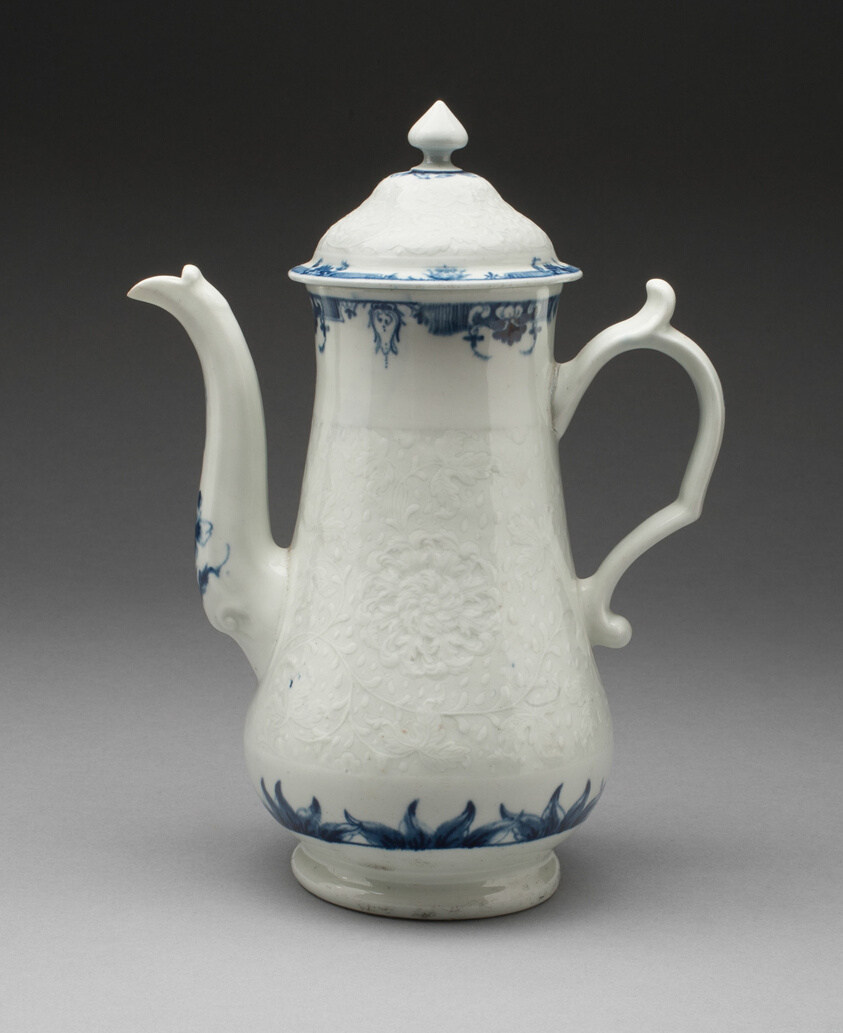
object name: Ceramics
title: Coffee Pot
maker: Worcester Porcelain Factory (Warmstry House Period, 1751–1783); Worcester, England, founded 1751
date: c. 1755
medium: Soft-paste porcelain, underglaze blue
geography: Worcester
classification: porcelain; european decorative arts; ceramics